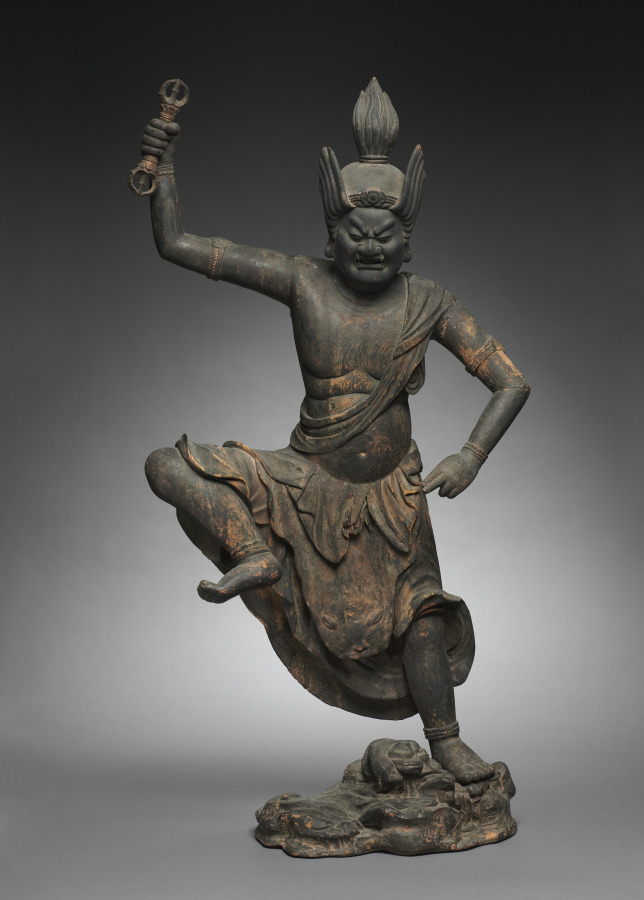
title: Zaō Gongen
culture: Japan, Kamakura period (1185–1333)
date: 1200s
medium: wood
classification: Sculpture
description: Zaō Gongen is the guardian deity of Mount Kinpu in Yoshino south of Nara. Zaō appeared at the behest of En no Gyōja, who prayed for a powerful protector of the mountain. The deity was described as a combined manifestation of the Buddha Shakyamuni, Thousand-Armed Kannon, and Miroku. These three deities were viewed as the past, present, and future protectors of the world. Zaō’s appearance derives from portrayals of fierce Buddhist deities.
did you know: Zaō Gongen wears the pelt of a large feline, the face of which is near his knee.